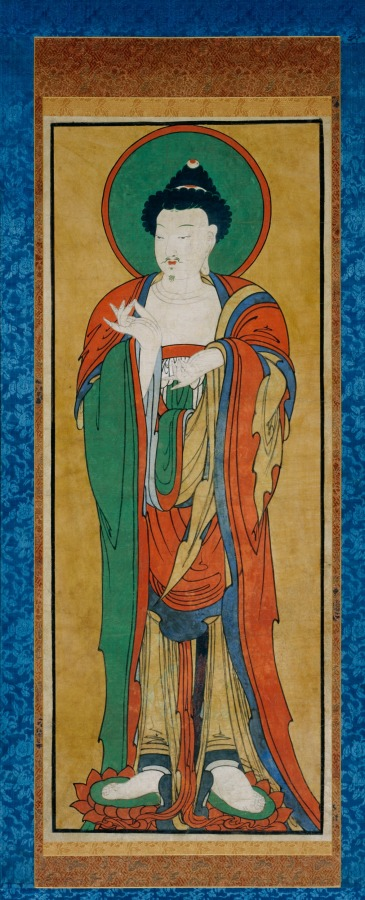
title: Tathagata Buddha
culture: Korea, Joseon dynasty (1392–1910)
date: late 1800s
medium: hanging scroll; ink and color on paper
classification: Painting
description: Buddhist paintings of the late Joseon period (from the 17th to the 19th century) have several characteristics different from their precedents. Generally, they were painted in bright mineral pigments on either thick paper or hemp. This large painting, which measures more than 2 meters tall, used to serve as a banner for outdoor Buddhist ceremonies such as the water-and-land rite (水陸會).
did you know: The term Tathāgata can be understood as both "one who has thus gone" and "one who has thus come."